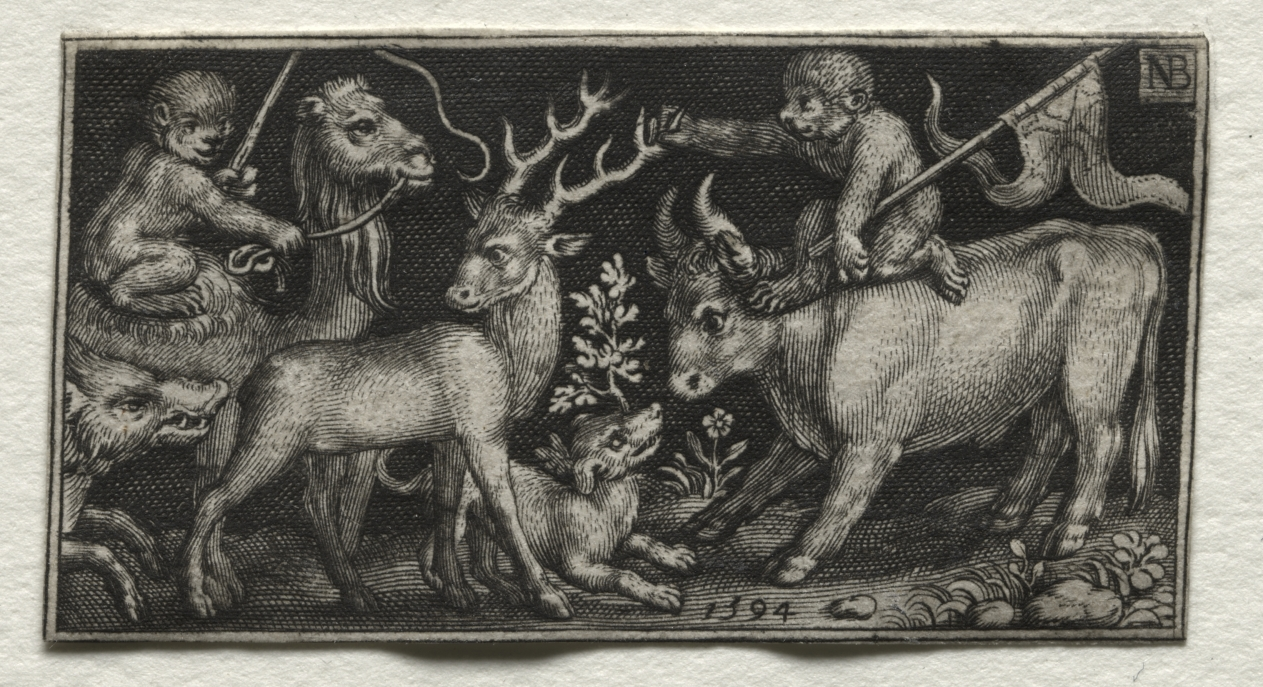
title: Monkeys Riding a Camel and a Bull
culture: Netherlands, 16th century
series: Fighting Chimeras and Scenes to Aesop's Fables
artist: Nicolaes de Bruyn (Netherlandish, 1571–1656)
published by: A. van Londerseel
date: 1594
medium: engraving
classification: Print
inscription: upper right, in plate: NB[in monogram] ; lower center, in plate: 1594 ; VERSO, lower left, in graphite: B4241 ; lower center, in graphite: 9[circled] FPO ; lower right, in graphite: 6264/140